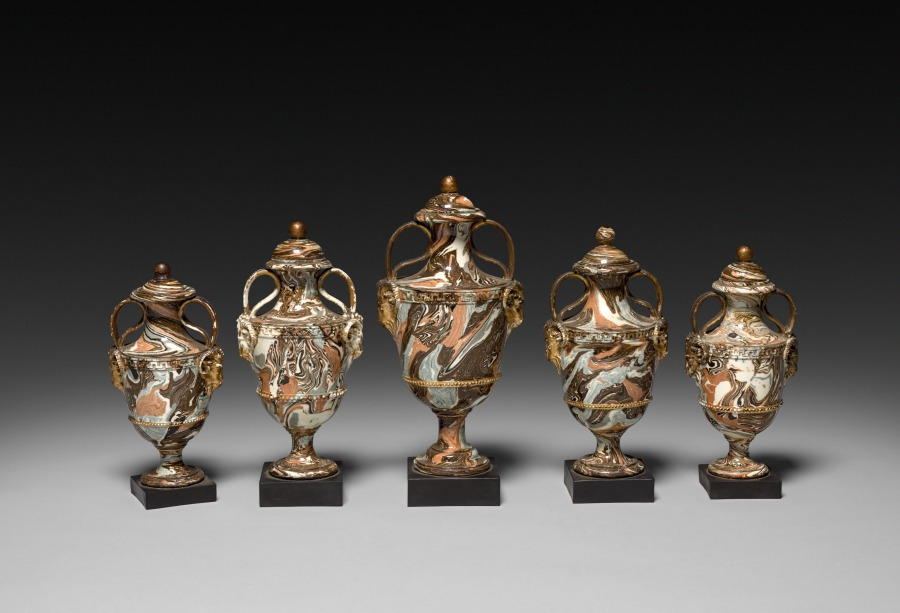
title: Urn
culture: England, late 18th or 19th century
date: late 1700s - 1800s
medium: earthenware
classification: Ceramic